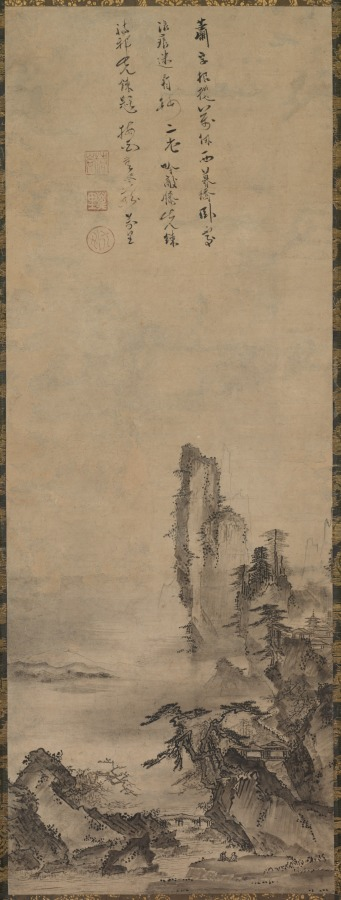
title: Lonely Temple and Towering Cliff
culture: Japan, Muromachi period (1392–1573)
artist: circle of Kenkō Shōkei (Japanese, active 1478–1506)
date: c. 1480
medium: hanging scroll; ink and slight color on paper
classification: Painting